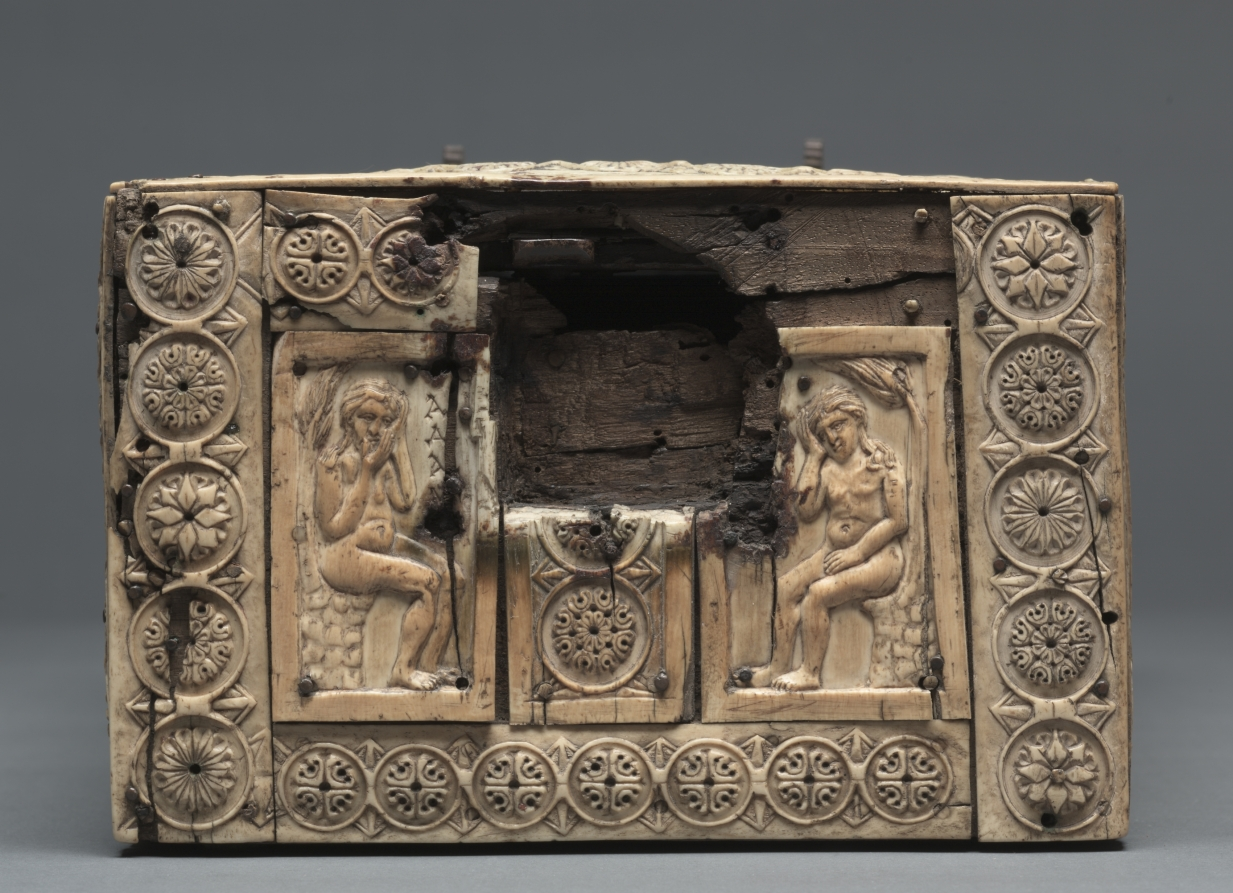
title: Ivory Box with Scenes of Adam and Eve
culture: Byzantium, Constantinople, Byzantine period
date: 1000–1100s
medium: ivory, wood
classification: Ivory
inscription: Greek inscriptions are included in each plaque.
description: Scenes from the Old Testament stories of Adam and Eve and their children, Cain and Abel, decorate this box, which may have been made to contain jewelry or small valuables. On its lid two plaques depict the creation of Adam and the creation of Eve from Adam’s rib. Two further plaques depict Cain slaying Abel: Cain throws a stone in the direction of Abel, who is hit by stones in the hip, chest, and head.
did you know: Carved out of imported ivory by skilled craftsmen, boxes such as these were used by Byzantine elites to store luxury goods such as jewelry.